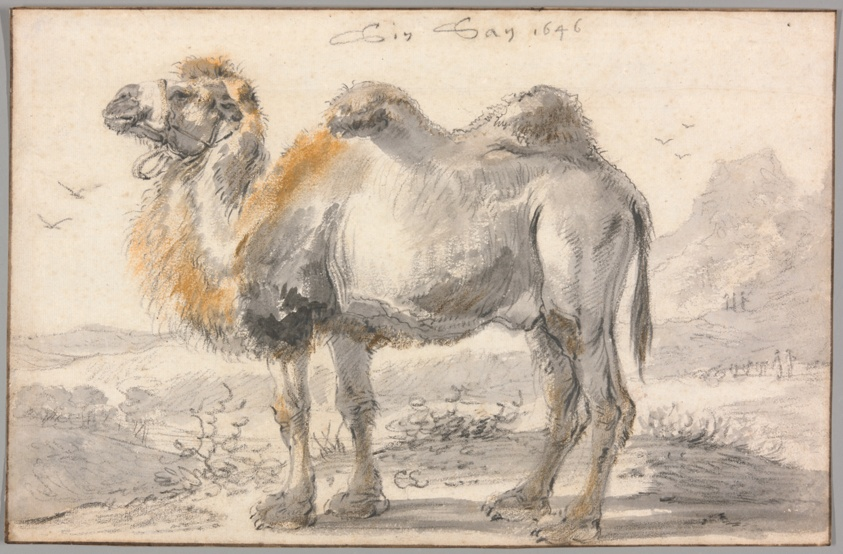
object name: Drawing and Watercolor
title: A Camel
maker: Cornelis Saftleven (Dutch, 1607-1681)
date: 1646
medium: Black chalk and brush and black wash, with touches of brown and ochre chalk, on ivory laid paper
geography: Holland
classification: ink or chalk wash; drawings (visual works); prints and drawing